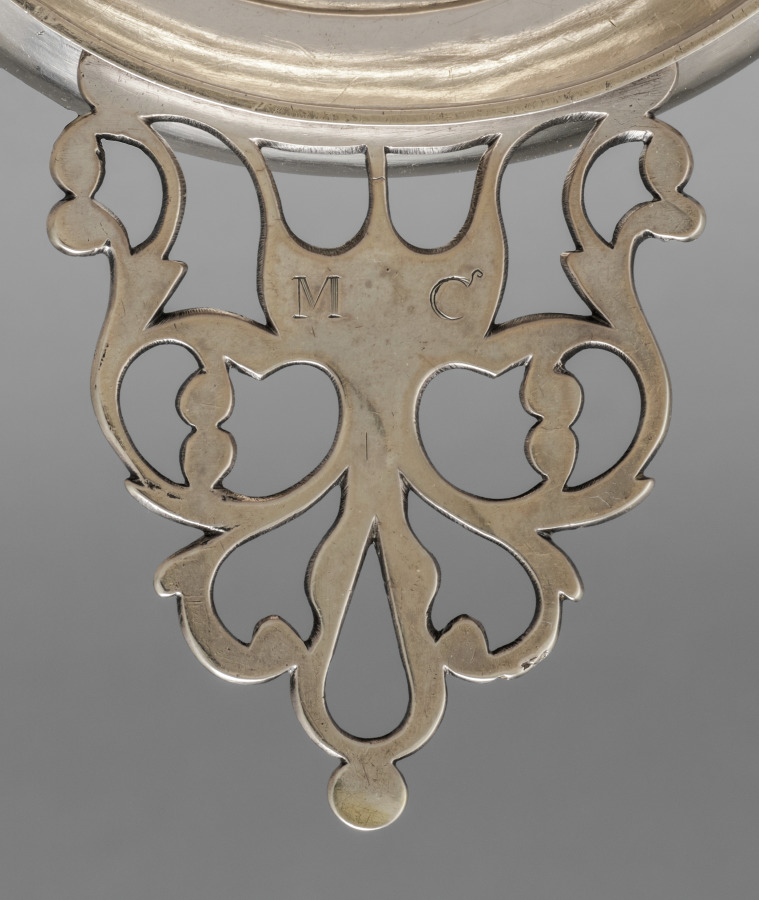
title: Porringer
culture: America, Massachusetts, Boston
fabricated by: Andrew Tyler (American, 1692–1741)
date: c. 1725–30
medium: silver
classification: Silver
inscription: engraved "MC" in block letters on top of handle (facing away from bowl). Scratched underneath handle: "8..12."